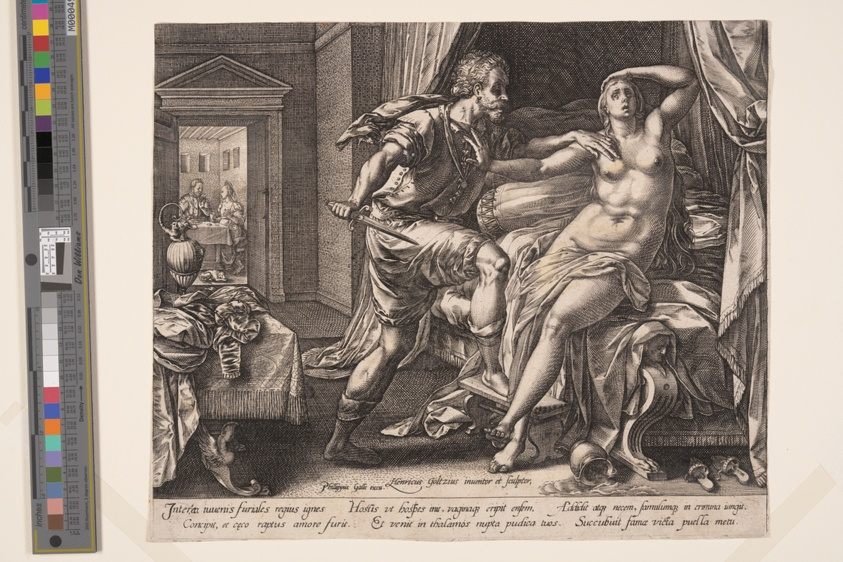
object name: Print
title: Tarquinius and Lucretia, from The Story of Lucretia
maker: Hendrick Goltzius (Dutch, 1558–1617)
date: 1578–79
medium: Engraving on laid paper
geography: Netherlands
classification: print; engraving; paper; prints and drawing